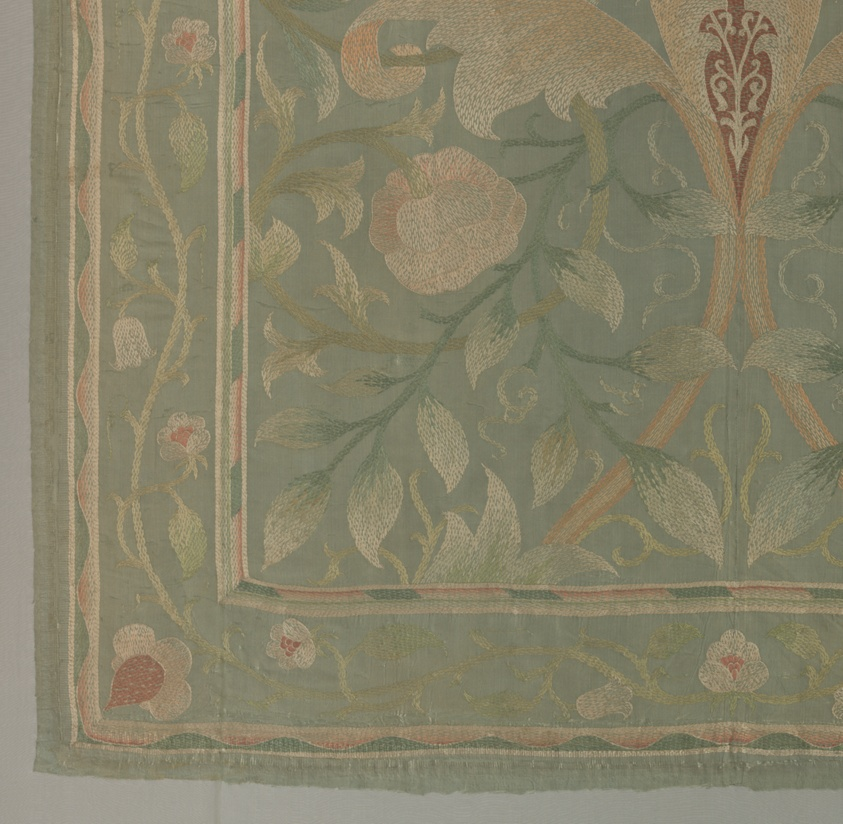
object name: Textile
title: Lotus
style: Arts and Crafts Movement, british, 19th century, British Arts and Crafts Movement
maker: Design attributed to May Morris (English, 1862–1938); Produced by Morris & Co., London (English, 1875–1940); Embroidered by the Decorative Arts Society, Chicago (American, founded 1877)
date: Design by 1888, made 1888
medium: Silk, warp-float faced twill weave; embroidered in satin and stem stitches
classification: textile; needlework (visual works)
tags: floral, lotus